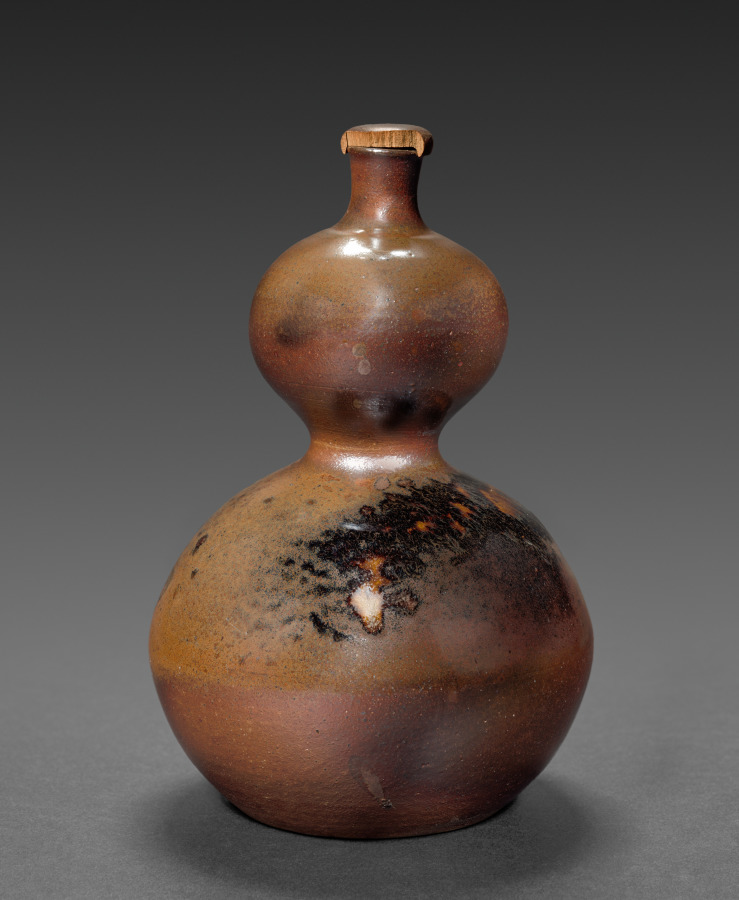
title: Double Gourd Jar with Wooden Stopple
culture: Japan, Edo period (1615–1868)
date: 1700s to mid-1800s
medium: stoneware (Bizen ware)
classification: Ceramic